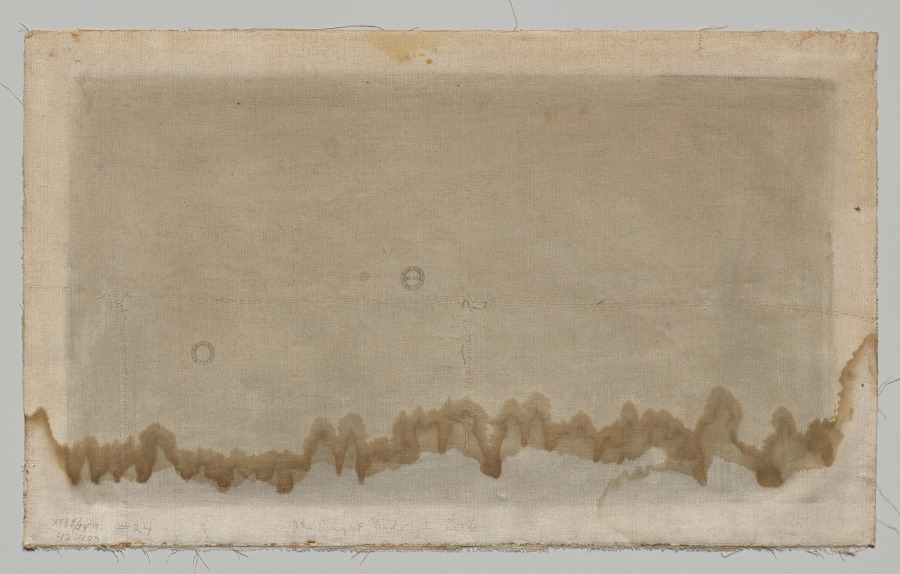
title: The Bright Side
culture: America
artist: Winslow Homer (American, 1836–1910)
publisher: Louis Prang (American, 1824-1909)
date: 1866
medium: lithograph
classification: Print